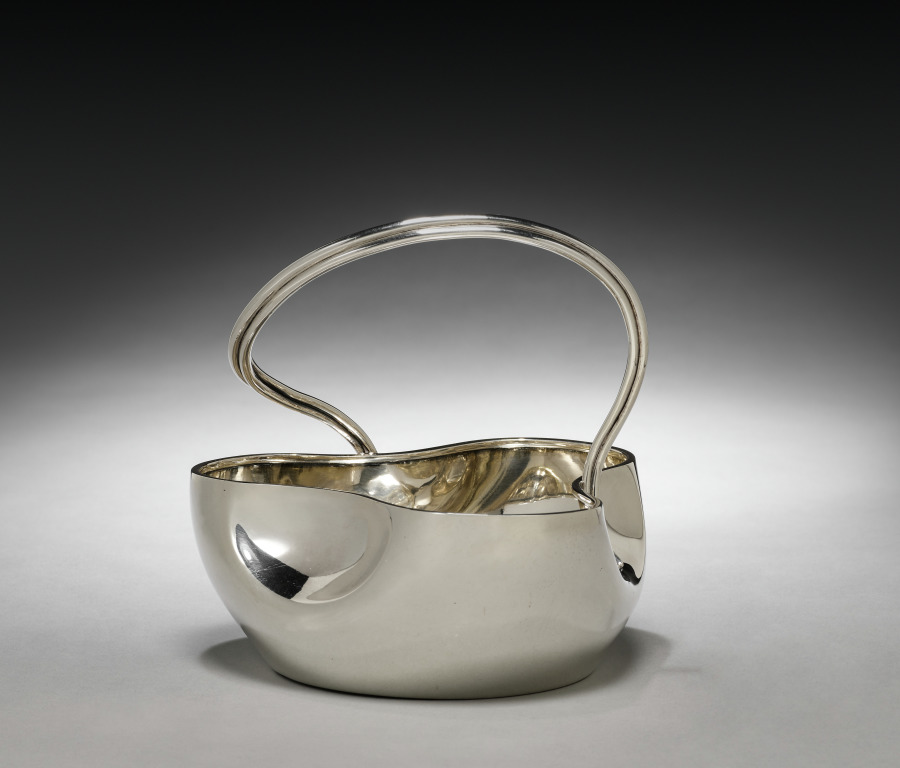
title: Bowl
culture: Russia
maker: House of Fabergé (Russian, 1842–1918)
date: 1895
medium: silver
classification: Silver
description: While Fabergé mainly produced objects with historicist ornamentation drawing upon earlier periods, the firm was also attentive to the latest fashions in the European decorative arts. This silver bowl is executed in the Art Nouveau style popular at the time. Its indented body and the asymmetrical handle convey a sense of liquid movement, accentuated by the undulating reflections on the silver surface.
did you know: The size suggests that it was used either for sweets or simply displayed for its aesthetic value.